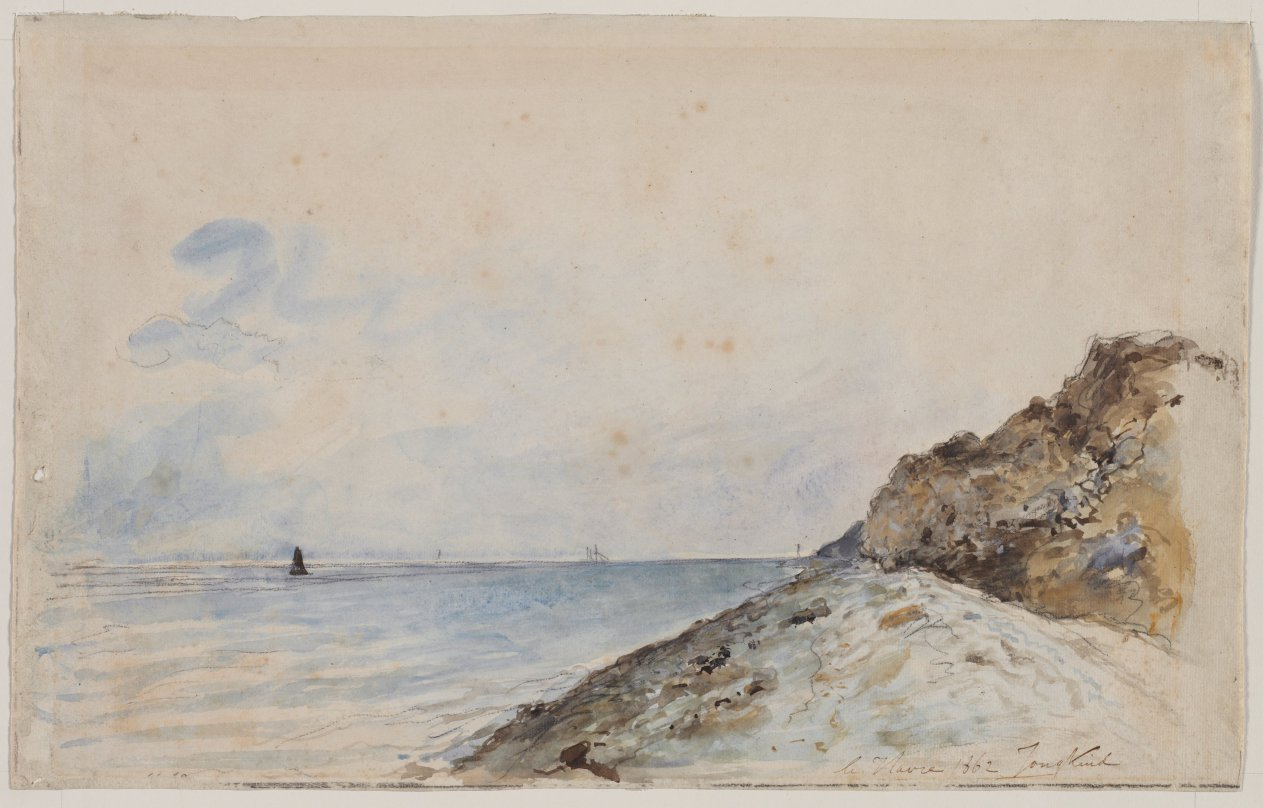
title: Le Havre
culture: Netherlands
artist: Johan Barthold Jongkind (Dutch, 1819–1891)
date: 1862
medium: watercolor, gouache and black chalk; framing lines in black chalk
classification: Drawing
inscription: signed, lower right, in brown ink: le Havre 1862 Jongkind [partially underlined] ; lower left, in graphite: [cropped, illegible] ; VERSO, upper left, in graphite: L.G. 7